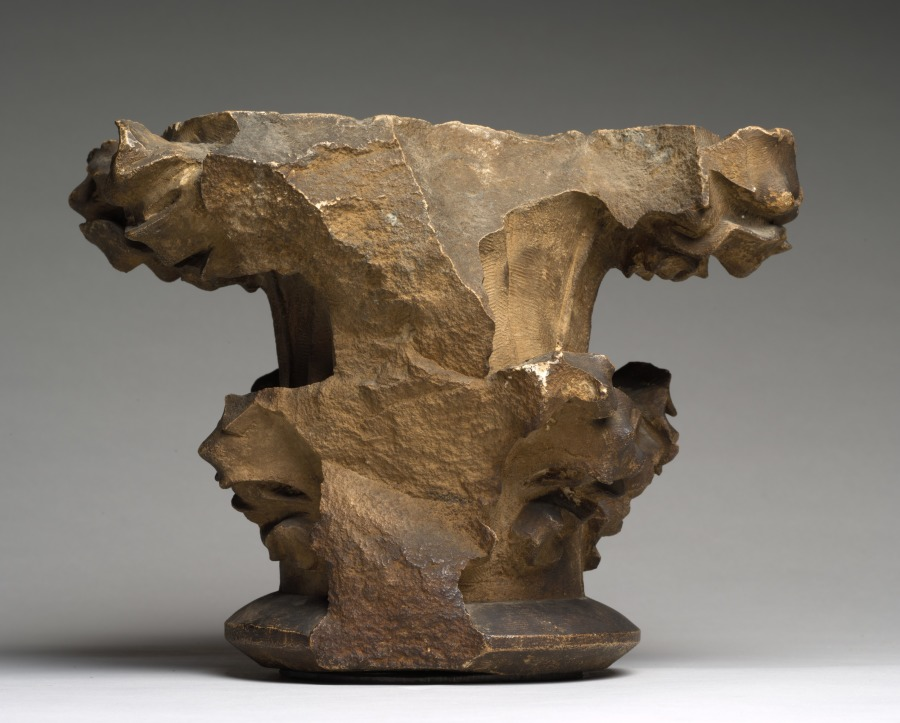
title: Column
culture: France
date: 1200s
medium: stone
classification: Sculpture